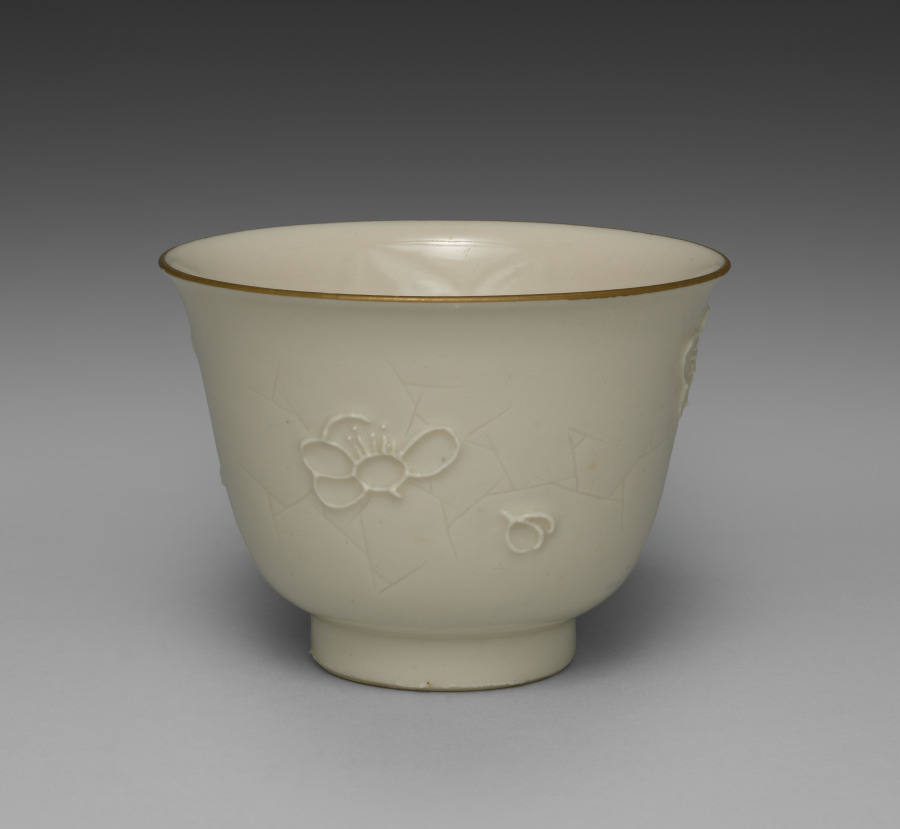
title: Drinking Cup from Dining Set with Plum Blossoms and Cracked-Ice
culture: Japan, Meiji period (1868–1912)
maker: Seifū Yohei II (Japanese, 1844–1878)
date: c. 1875–78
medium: Porcelain with molded designs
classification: Ceramic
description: Each item in this set has a delicate low-relief design of flowering plum branches over scattered, intersecting lines meant to resemble the cracked-ice surface of a frozen body of water and is signed on the base in gold pigment. While Yohei II produced many fine works in underglaze blue, like those produced by Kiyomizu Shichibei, he also made works in quite different styles later in his career, from the early 1870 s. In 1873, he was appointed purveyor to the Industrial Center of Kyoto Prefecture, a designation associated with Kyoto’s efforts to reach an international market through the port of Kobe; and from 1875 until his death, he was involved in national-level projects to present Japanese ceramics across the world. It was during this period that Yohei III was apprenticed to Yohei II, and it has been suggested that this set may in fact be an early example of Yohei III’s work, which he signed with his teacher’s name. Decorated with flowers resembling Japanese textile motifs, the set calls to mind the design of Yohei II’s pair of vases with plum blossoms in the Victoria and Albert Museum. Here, the elaborate trees created for a formal public exhibition setting have been translated into the approachable blossoms of the genteel domestic environment. While the designs are consistent across the pieces, each raised flower petal and pistil and each incised line in the ice was done by hand, so the cups, bowls, and dishes are similar yet unique. The bottoms of two boxes once identified the set’s owner, but the information has been deliberately obscured with black ink. However, inscriptions still visible appear to indicate two occasions, once at the end of July 1886 , and once again in June 1916 , when parts of the set were requested from Hokura in Niigata Prefecture. The location corresponds to a neighborhood in the present-day city of Jōetsu. The surname Tsuji 辻 also appears on a paper tag affixed to one of the box cloths. Future research may possibly reveal more about their provenance. A vase by Yohei III in a private collection combines the formal grandeur of the Yohei II vases in the Victoria and Albert Museum with the gentler design of this dining set, placing flowering plum trees against soft, scalloped-edge clouds resembling those in golden screens.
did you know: The dining wares have a creamy white coloration that the four boxes containing them identify as Korean in style.